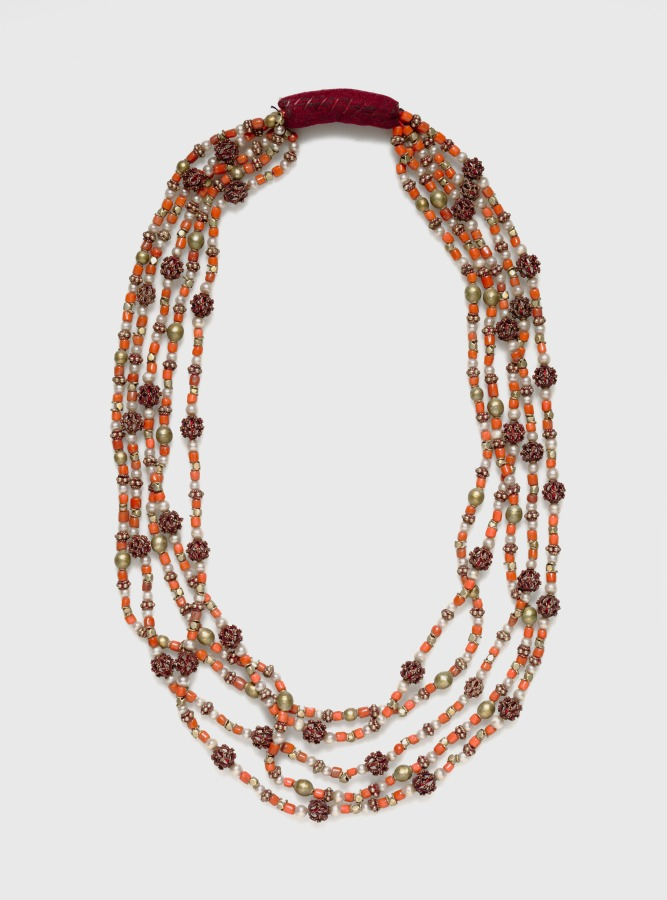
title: Necklace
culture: Siam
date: 1800s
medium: coral, pearl, and silver beads covered with red lacquer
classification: Jewelry